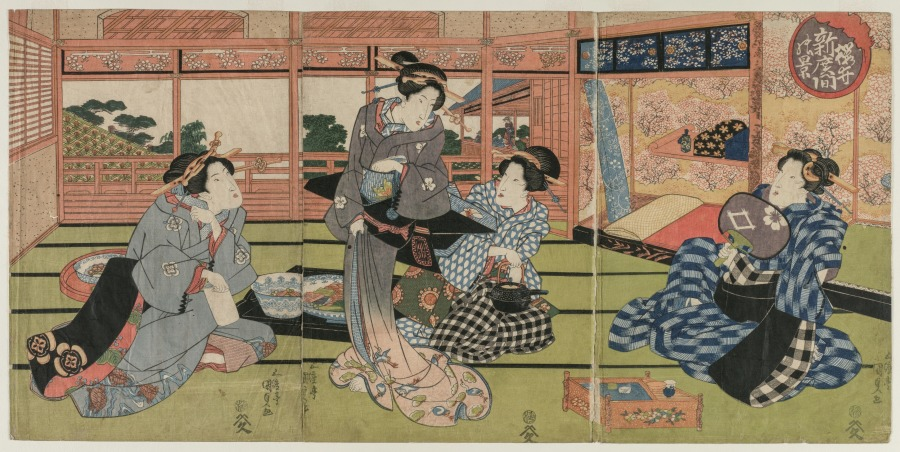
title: A View of the Large New Room at Sakurai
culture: Japan, Edo period (1615–1868)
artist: Utagawa Kunisada (Japanese, 1786–1865)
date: early or mid 1830s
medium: color woodblock print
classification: Print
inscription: Artist's signature: Gototei Kunisada ga.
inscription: Publisher: Yamamotoya Keikichi (emblem). Censorship Seal: kiwame.